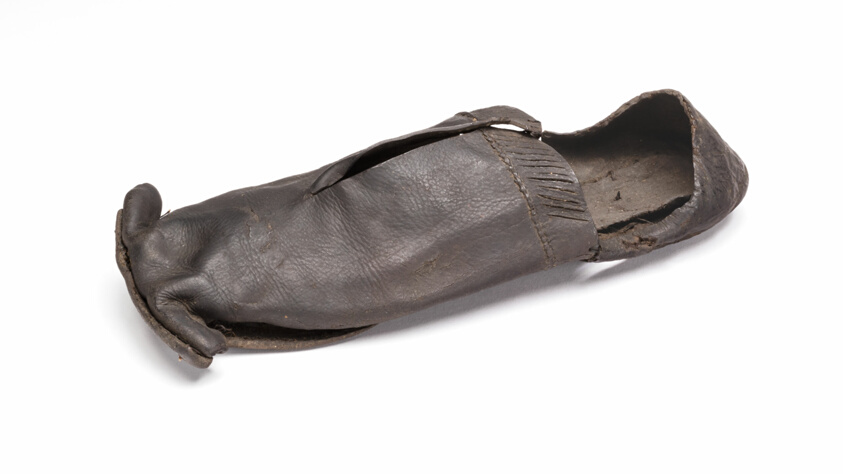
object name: Textile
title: Shoe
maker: England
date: 16th century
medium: Horned toe, one slash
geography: England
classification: textile; costume accessory - shoe; shoes - misc; costume; dress (garment); clothing